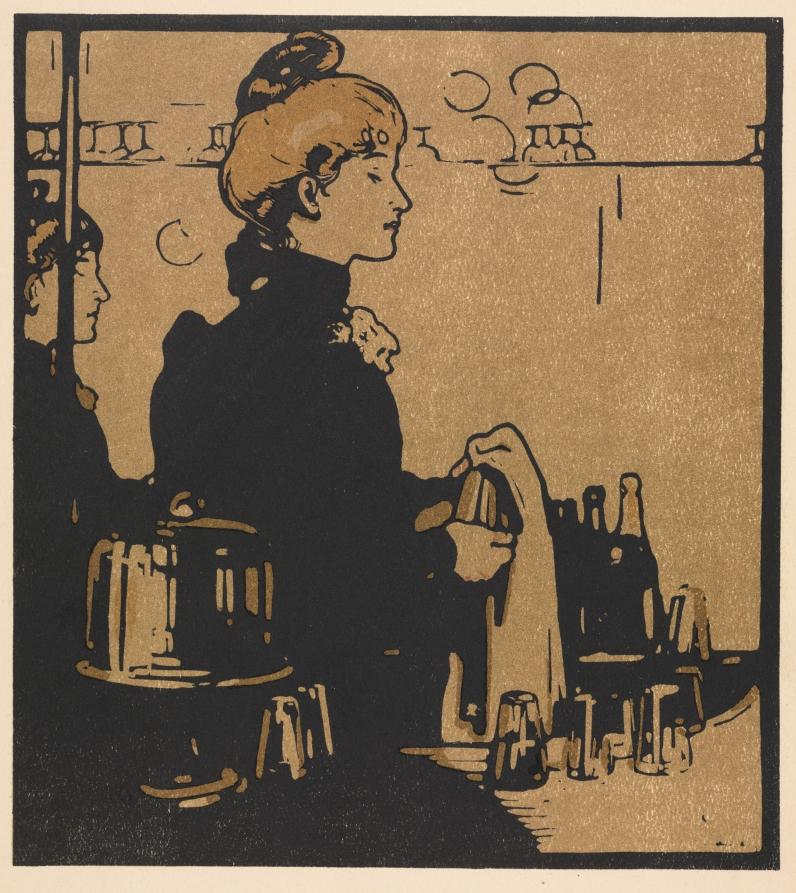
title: London Types: Barmaid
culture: England, 19th century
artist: William Nicholson (British, 1872–1949)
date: 1898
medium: color lithograph with watercolor added by hand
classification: Print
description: London Types celebrates the affection residents felt for their city at the end of the 19th century. The series includes many depictions of women because the publisher William Heinemann, a strong supporter of the struggle for equality, advised the artist to represent both sexes equally. The scenes document London of the 1890s with contemporary references.